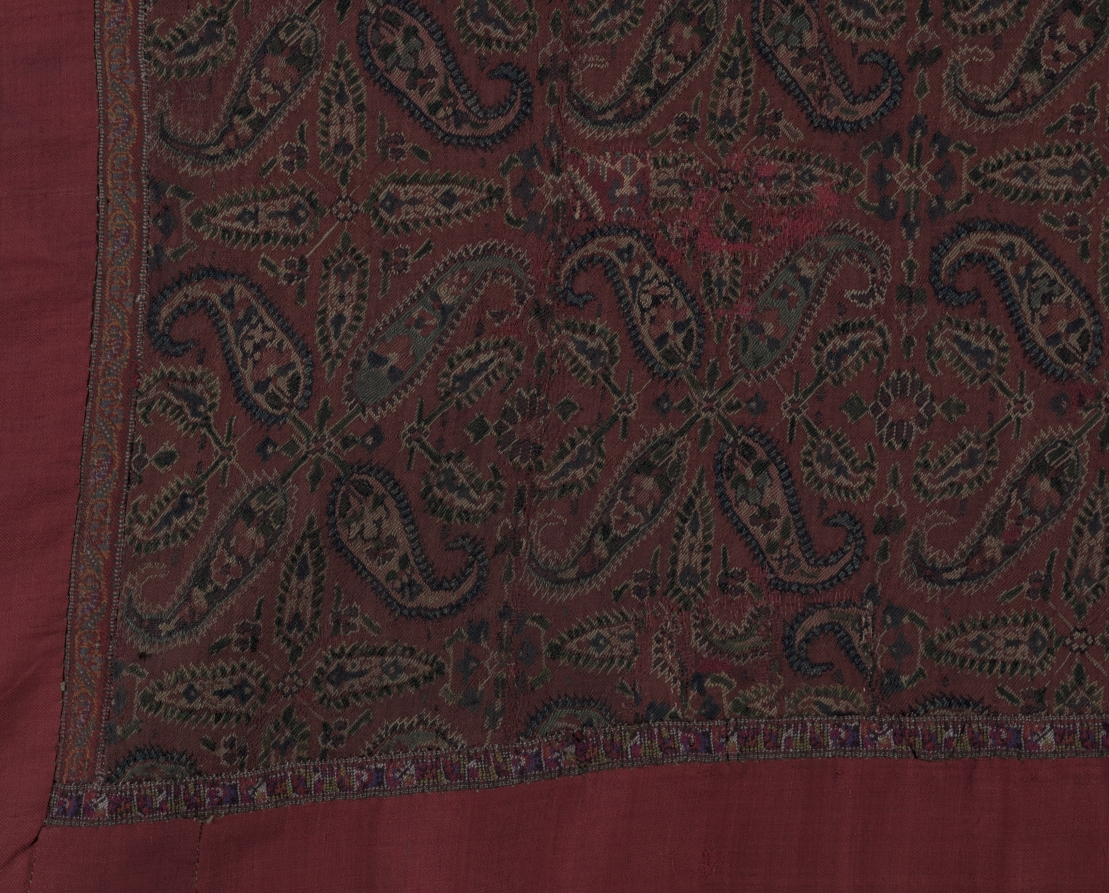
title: Fragment of a Shawl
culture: India, Kashmir, late 18th - early 19th century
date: late 1700s - early 1800s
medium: tapestry twill; wool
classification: Textile